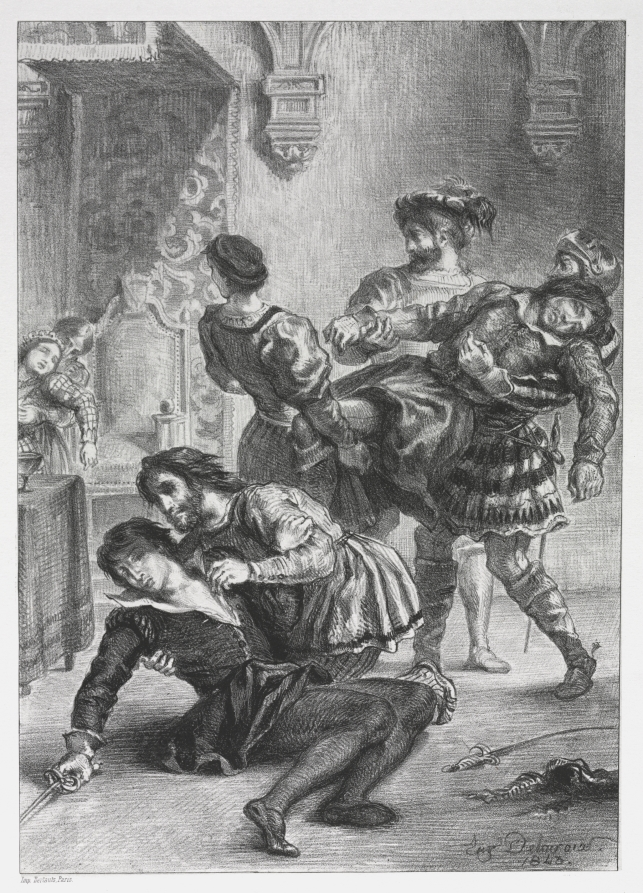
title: Hamlet: The Death of Hamlet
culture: France, 19th century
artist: Eugène Delacroix (French, 1798–1863)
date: 1843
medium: lithograph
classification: Print